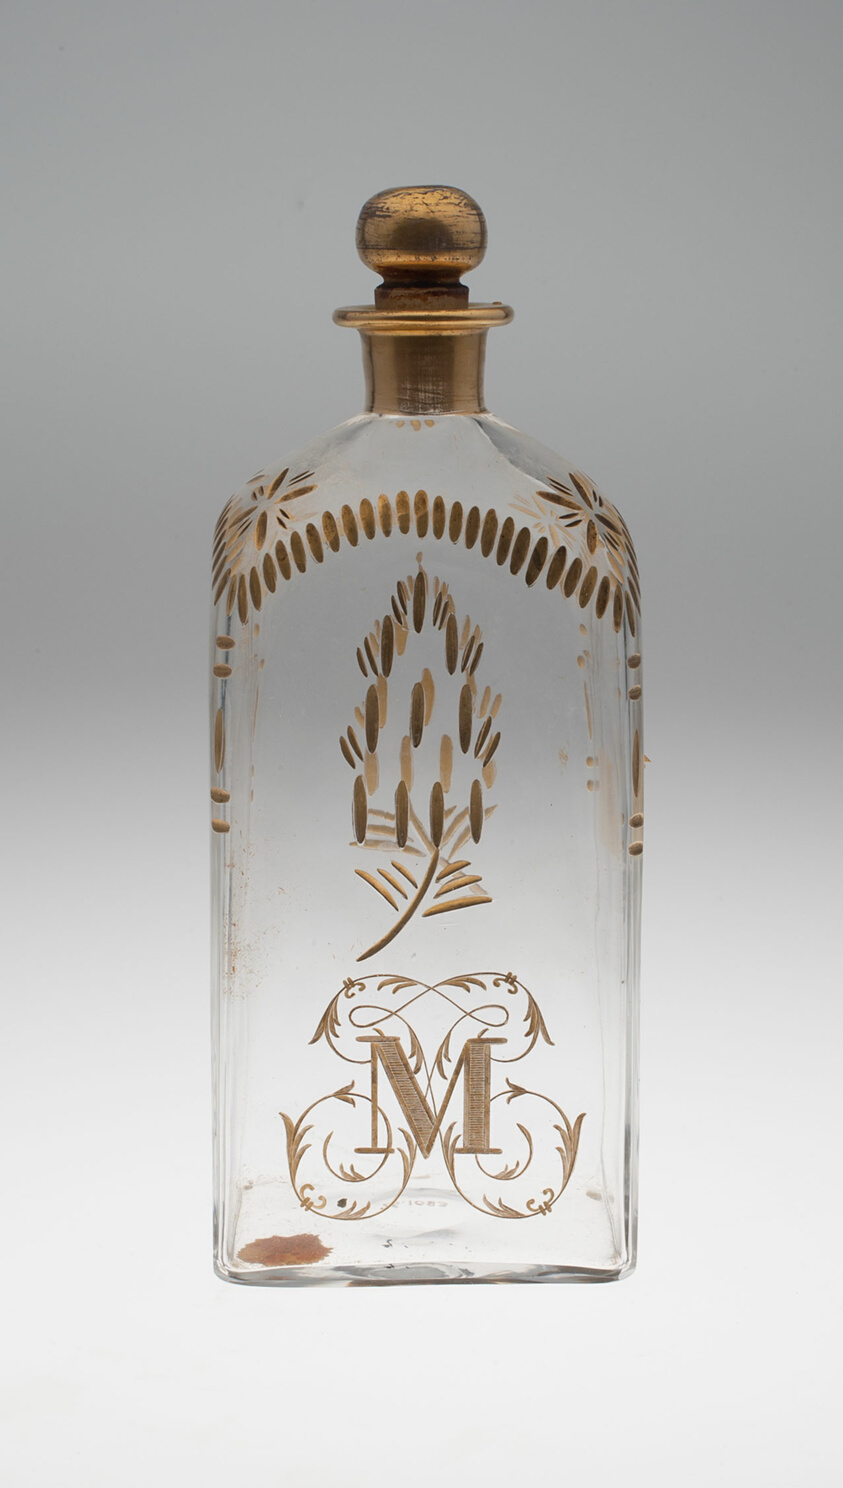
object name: Glass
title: Tall Bottle with Stopper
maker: Spain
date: c. 1771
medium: Glass with gilt decoration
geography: Spain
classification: glass; european decorative arts